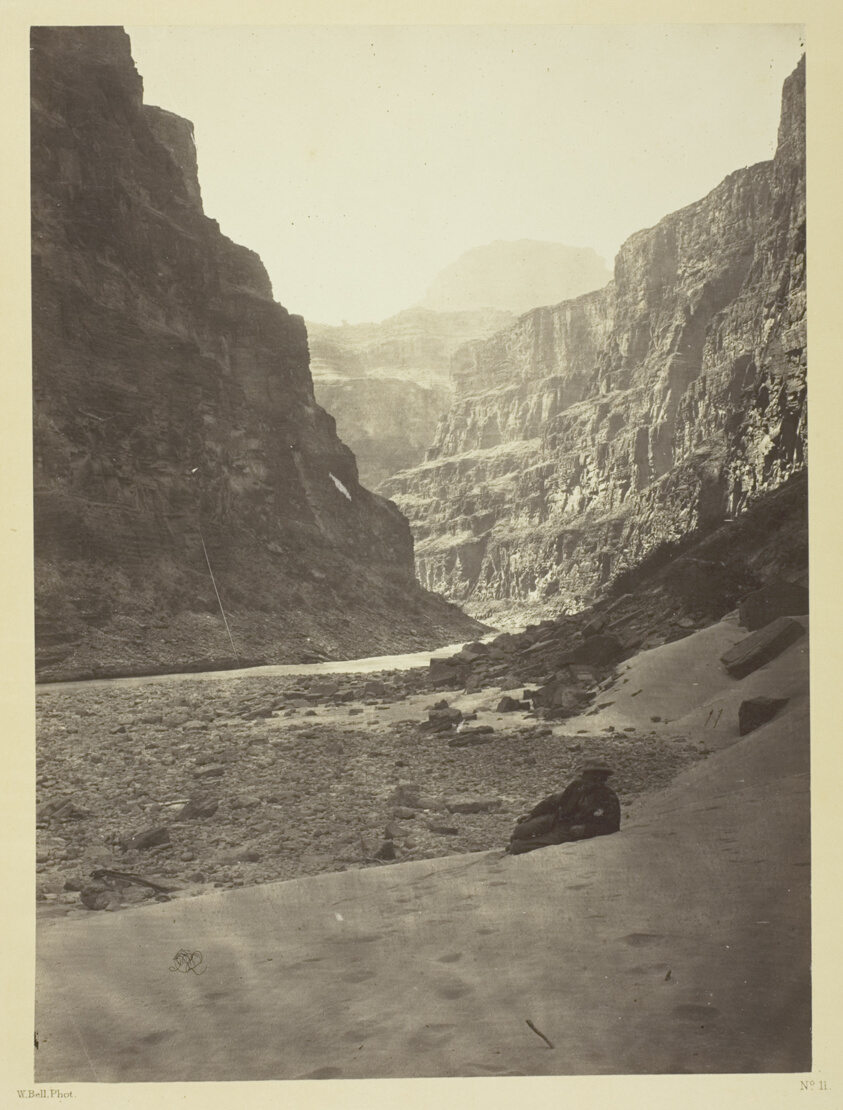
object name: Photograph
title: Grand Cañon of the Colorado River, Mouth of Kanab Wash, Looking West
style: 19th century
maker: William H. Bell (American, 1830–1910)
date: 1872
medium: Albumen print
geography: United States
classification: albumen print from collodion negative; photograph; photography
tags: Collected by Hugh Edwards